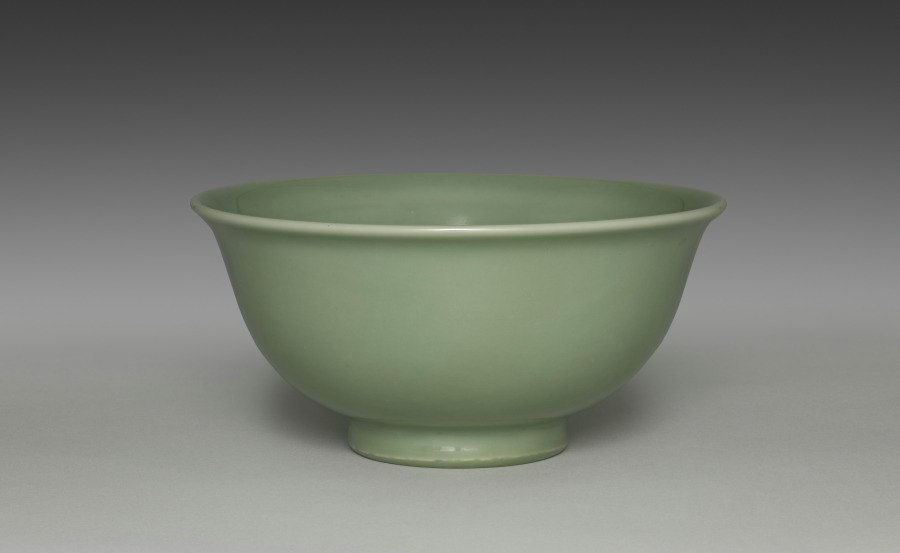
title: Dining Bowl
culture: Japan, Meiji period (1868–1912)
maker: Seifū Yohei III (Japanese, 1851–1914)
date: 1912–14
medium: Porcelain with green glaze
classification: Ceramic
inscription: 共箱の箱書：（蓋表）秘色彩古磁盂（印：清風）；（蓋裏）清風制之（印：帝室技藝員）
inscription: 彫銘：清風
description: This Yohei III dining bowl with an everted rim has a glaze identified in its box lid inscription as hisoku (C. mise), or “mysterious color.” This name typically refers specifically to a type of high-quality, green-glazed ceramic produced in the ninth and tenth centuries at the Yue kilns in China’s Zhejiang Province as tribute ware for the imperial family.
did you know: Many ceramics created by the Seifū Studio refer to and emulate Chinese ceramics in form and glazing.